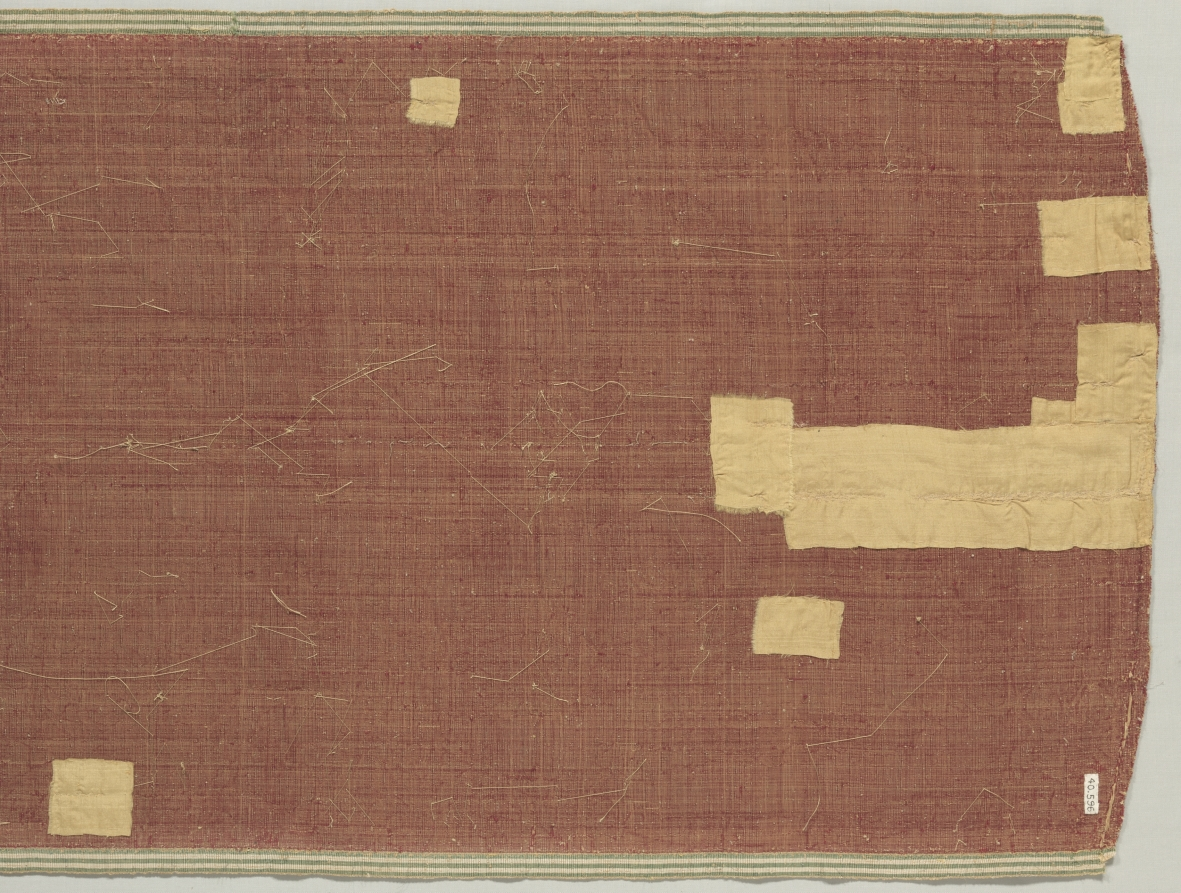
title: Silk Velvet with Gold in Pomegranate Pattern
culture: Italy, possibly Florence, 15th century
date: 1450–1500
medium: silk, gold thread; velvet: cut pile in two heights, uncut pile loops, gold-thread loops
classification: Velvet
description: Luxurious silk velvets with expensive gold thread were symbols of wealth and power. The finest velvets during the 1400s have two, or even three, heights of lush projecting pile. This fashionably large pomegranate pattern features exorbitant gold-thread loops enriching the lower level and a plain higher level. The curved upper and lower contours suggest this was the back of a sleeveless ecclesiastical vestment known as a chasuble. The striped green and ivory selvage was the equivalent of a label, required by law. It identified the fiber content, its quality, and quantity, which determined the price. Selling prices reflected the costs of the raw materials—gold thread, silk, and dyestuffs. Compensation for artisans was generally minimal.